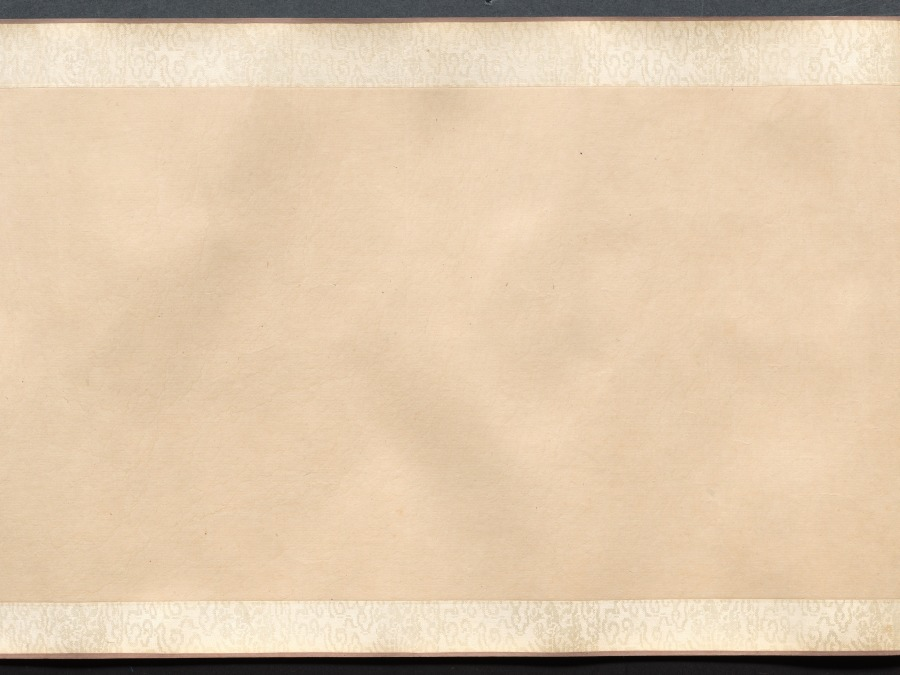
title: Four Poems: Calligraphy in Cursive Script (xingshu)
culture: China, Ming dynasty (1368–1644)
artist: Chen Jiru (Chinese, 1558–1639)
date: 1500s-1600s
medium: handscroll; ink on gold speckled paper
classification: Calligraphy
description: Written in graceful calligraphy with well-composed characters, the artist communicates his thoughts and state of mind in four poems. Characters written in dark, thick strokes convey rhythm, and indicate the moment after the writer had paused to recharge his brush with ink. Chen Jiru was a native of Huating (modern Shanghai). His calligraphy style resembles that of his friend, influential calligrapher Dong Qichang (1555–1636). Unlike Dong, Chen did not pursue government service: he burned his Confucian robes, declined a summons to serve at court, and immersed himself in literature, calligraphy, and painting.